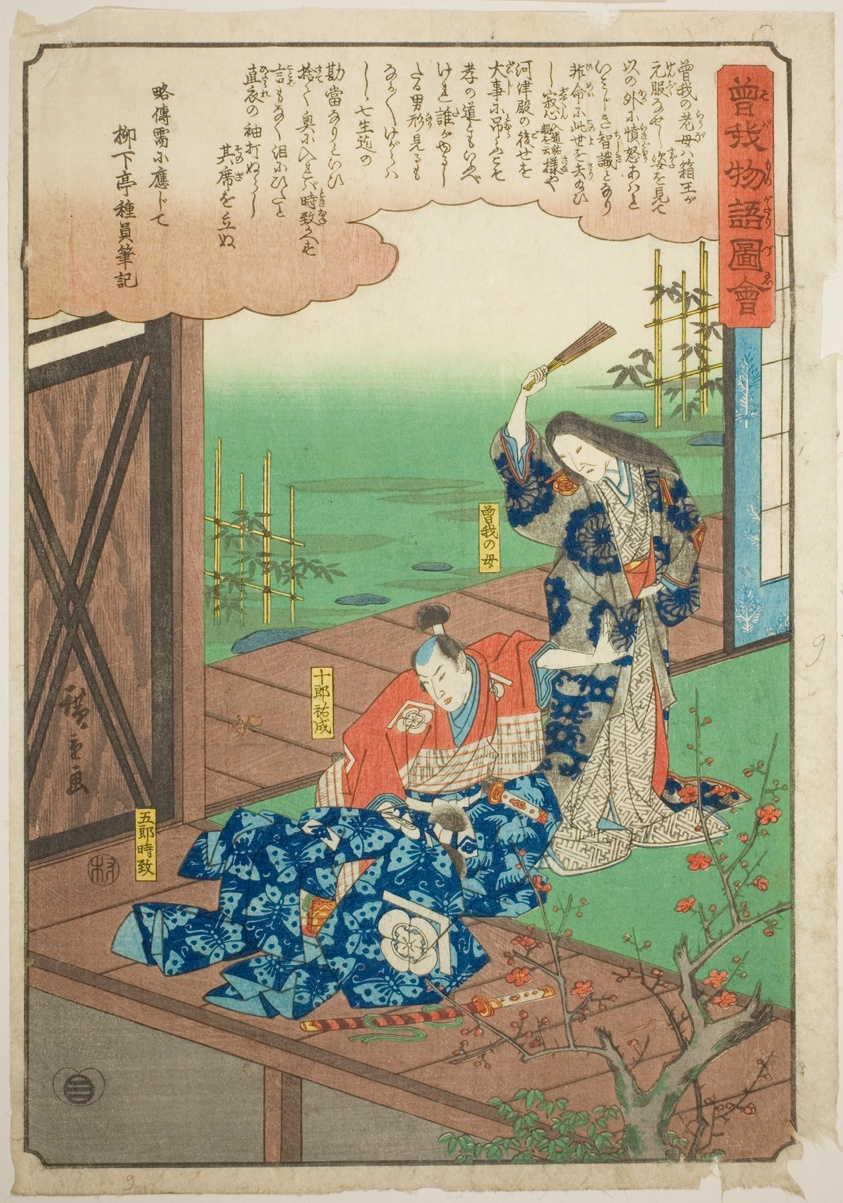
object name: Print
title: Soga on Goro admonished by his mother, from the series "Illustrated Tale of the Soga Brothers (Soga monogatari zue)"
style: Japanese (culture or style)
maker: Utagawa Hiroshige 歌川 広重; Japanese, 1797-1858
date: c. 1843/47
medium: Color woodblock print; oban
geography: Japan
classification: woodblock print; print; asian art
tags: mothers, parents